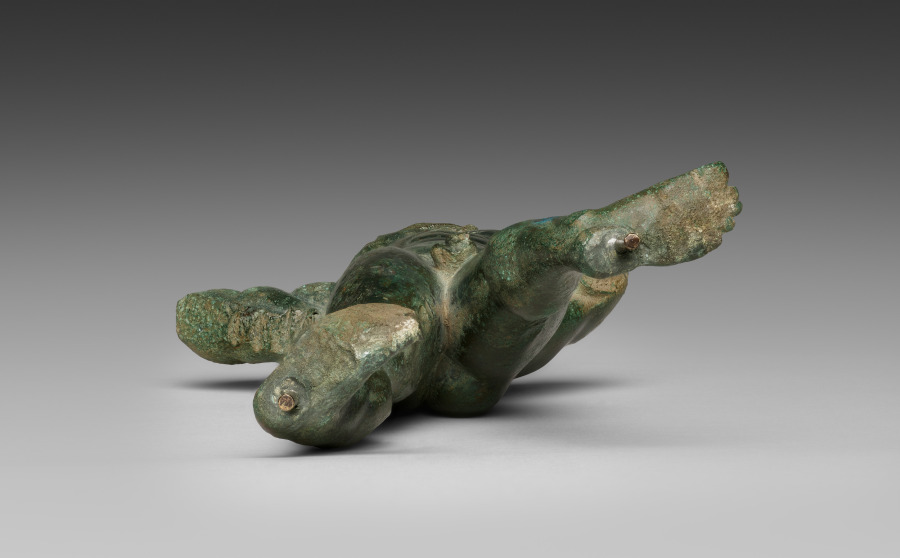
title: Statuette of Herakles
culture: Greek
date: 510–500 BCE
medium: bronze (solid cast)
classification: Sculpture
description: Striding forward with his left foot, this nude figure turns his torso and raises his tightly bent right arm behind his head. Despite significant damage, the statuette conveys a naturalistic sense of form and movement rarely seen in early Greek art. Its most striking feature is its powerful physique, with sharply defined, bulging muscles. Formerly called an athlete and assumed to have held a javelin or discus, the figure likely depicts the hero Herakles, revered for his strength and often shown in this smiting pose, wielding a club. Though usually bearded in this period, this representation emphasizes his youthfulness, with an idealized face and carefully arranged hair.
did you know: This robust figure exudes power, despite his damaged feet and missing hands.